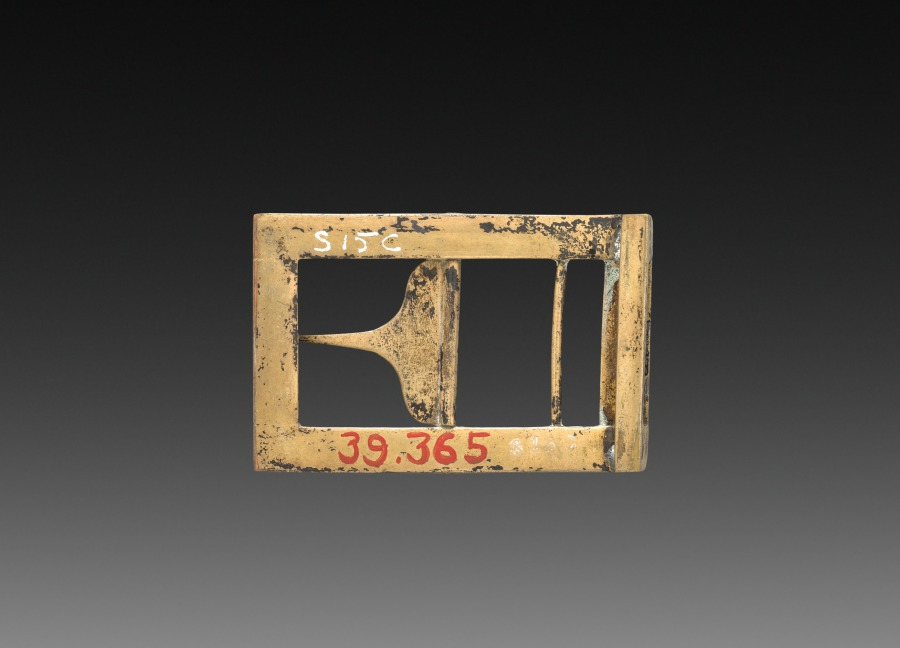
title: Belt Buckle with Radishes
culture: Japan, Meiji period (1868–1912) to Taishō period (1912–26)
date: early 1900s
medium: cloisonne enamel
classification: Enamel